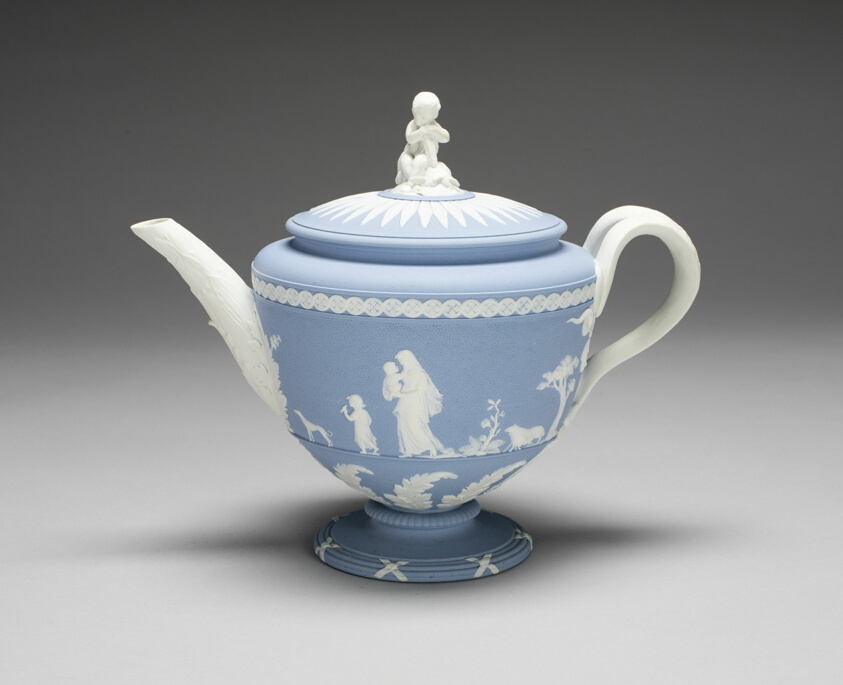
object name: Ceramics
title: Teapot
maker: Wedgwood Manufactory; England, founded 1759; Etruria, Staffordshire, England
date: 1775/80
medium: Stoneware (jasperware)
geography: Burslem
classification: teapot; teaware; stoneware; european decorative arts; ceramics